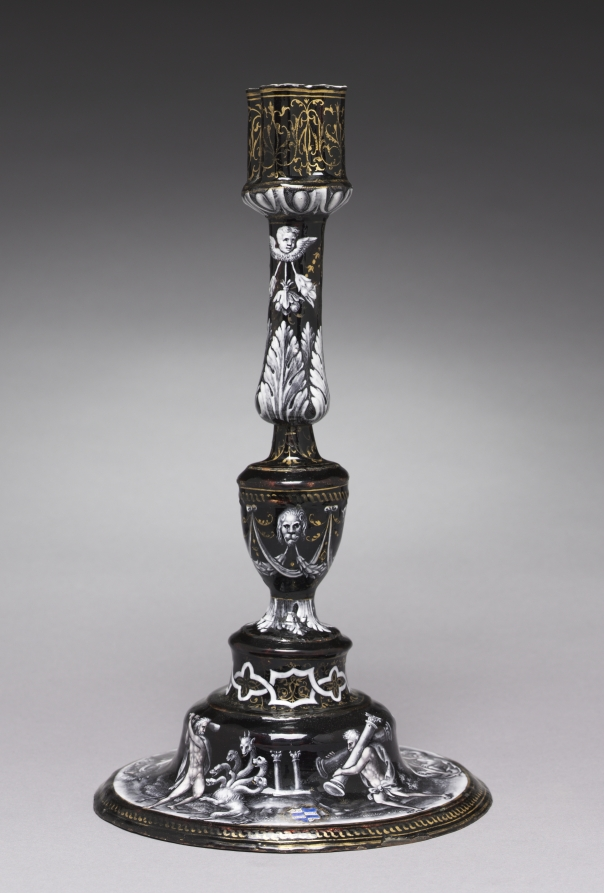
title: Candlestick Depicting Five of the Seven Labors of Hercules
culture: France, Limoges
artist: attributed to Jean II de Court (French, before 1583)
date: c. 1565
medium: painted enamel (grisaille) on copper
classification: Enamel